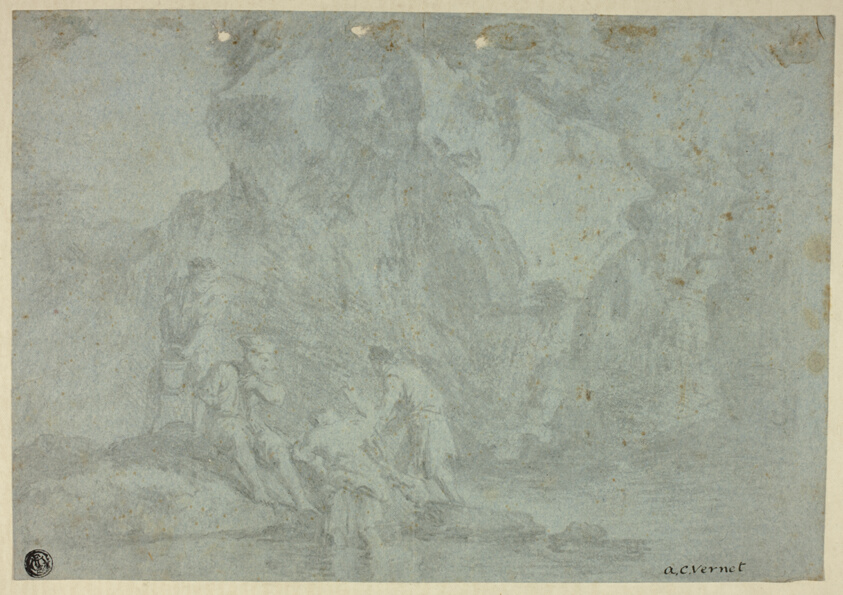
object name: Drawing and Watercolor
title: Rocky Landscape with Figures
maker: After Gaspard Dughet; French, 1615-1675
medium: Black chalk counterproof, heightened with white chalk, on blue wove paper, tipped onto cream wood-pulp laminate board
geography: France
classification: chalk; drawings (visual works); prints and drawing